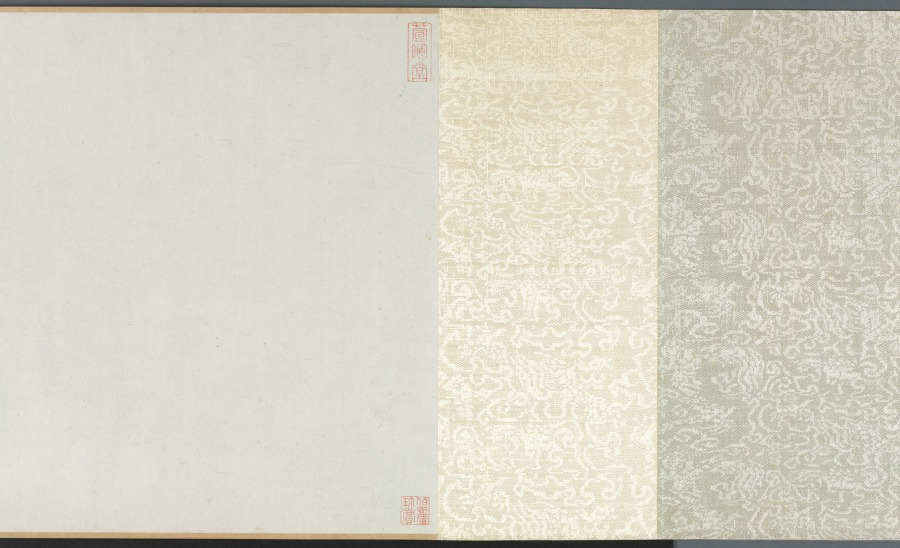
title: Water Village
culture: China, Ming dynasty (1368–1644)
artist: Wen Boren (Chinese, 1502–1575)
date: 1570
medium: handscroll; ink and light color on paper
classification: Painting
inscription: 隆慶庚午秋仿趙文敏筆. 五峰文伯仁 [印] 五峰山人; 文伯仁印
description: In the autumn of 1570, Wen Boren painted this seemingly unemotional scene of low-lying marshlands with a chain of rounded mountains in the background. A fishing boat is nestled on the shore near the village. Although paths and bridges traverse the landscape, only two people are visible in the stillness. From the restrained atmosphere of this landscape, one would never guess that Wen Boren was known as the “bad boy” of the Wu School for his explosive temper. As a younger man, he was even embroiled in a contentious lawsuit with his own uncle, Wen Zhengming (1470–1559), a master of Ming dynasty painting with whom he had trained. The ideal of the scholar-painter, or literati, was that an artist’s moral character is reflected in his paintings, so there was great incongruity between Wen Boren’s difficult personality and his restrained landscapes. A contemporary, Wang Shizhen, wrote this about him: "This gentleman is prone to behave odiously and screamed accusations at people. How is it possible for him to carry in his bosom such a wealth of scenic wonders?" Who knows what effort it took to subdue his fractious spirit to project an image of coolness and refined taste in his paintings?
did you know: A foreground tree has an eccentric twisting silhouette and pepper-dot "halo" of leaves.